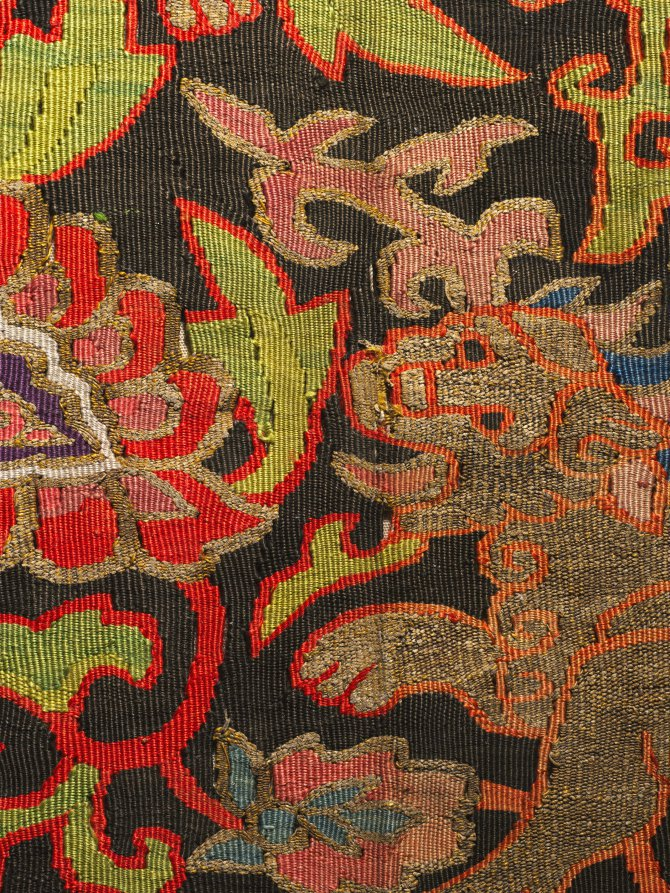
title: Tapestry with golden lions and palmettes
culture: Central Asia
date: 1200s or earlier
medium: silk, gold thread; tapestry weave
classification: Tapestry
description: This reversible tapestry (kesi) fragment, woven with silk and metal thread, is a section from yardage likely intended for a garment, but no contemporary paintings exist to confirm this. A fringe of warps and a striped starting edge are preserved at the bottom of this fragment, as is a selvage along the left edge. Iranian golden lions, traditional symbols of royalty, are depicted amid large palmette leaves on vines. This kesi is different from other Central Asian silk kesi in the repetition of lions and palmettes in horizontal rows, facing alternate directions in an asymmetrical Chinese-inspired layout. But the depiction of lions with parted manes and tilted heads dates from the Sasanian dynasty of Iran (226–637 CE). The palmettes are common to both the Iranian world and Central Asia. This kesi may have been woven by Uyghurs living in the vicinity of Khotan, where the influence of Iranian culture was strong.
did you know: Dye analysis has been done on some of the colored yarns in this fragment. The orange, scarlet, and pink dye comes from the safflower plant, the red and darker pink dye from the bark of a small evergreen tree called the China brasiliensis, and the blue dye from the indigo plant.